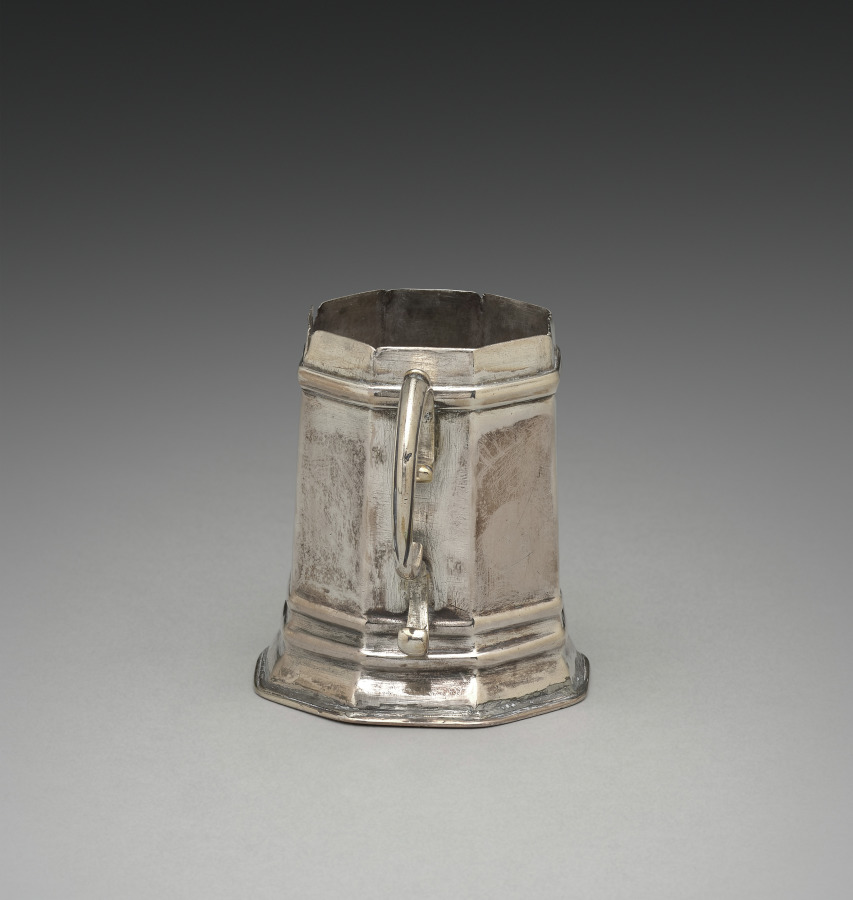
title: Caster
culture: America, Massachusetts, Boston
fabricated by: Andrew Tyler (American, 1692–1741)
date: c. 1720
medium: silver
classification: Silver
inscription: engraved: "M" over "D * L" in shaded block letters on bottom, and "AM" in block letters on front, opposite handle.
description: A caster was used to spread a finely ground substance, probably pepper.